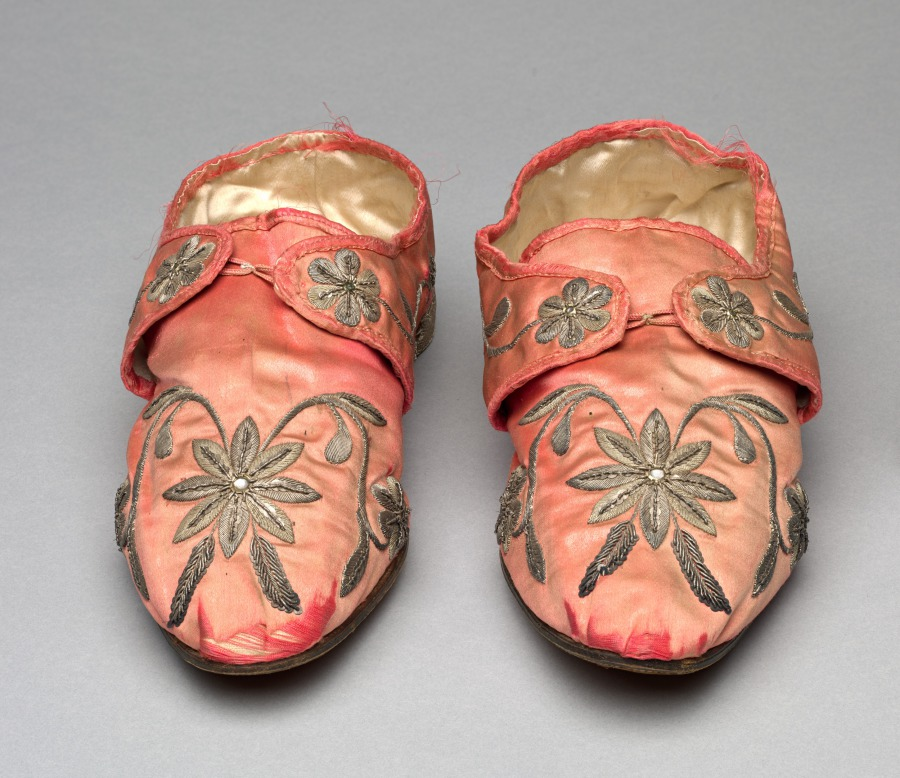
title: Pair of Slippers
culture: Italy, Venice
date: early 1700s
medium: Silk: satin weave with silver metal thread embroidery and trim; spangles; leather soles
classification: Garment